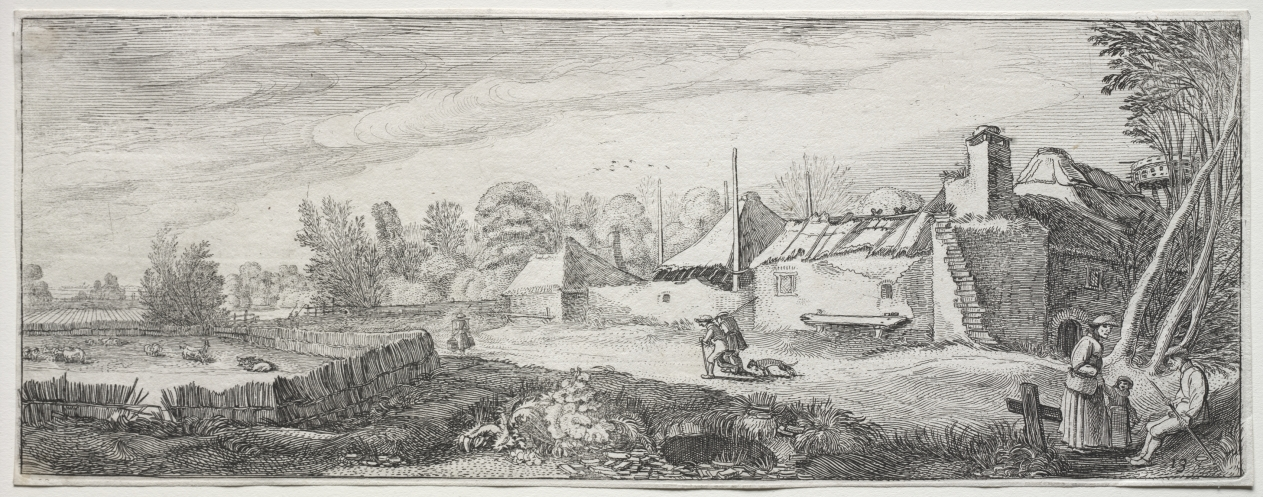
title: Some Pleasing Landscapes and Ruins of Ancient Monuments: Dilapidated Farm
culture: Netherlands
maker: Jan van de Velde II (Dutch, 1593–1641)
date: 1615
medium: etching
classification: Print